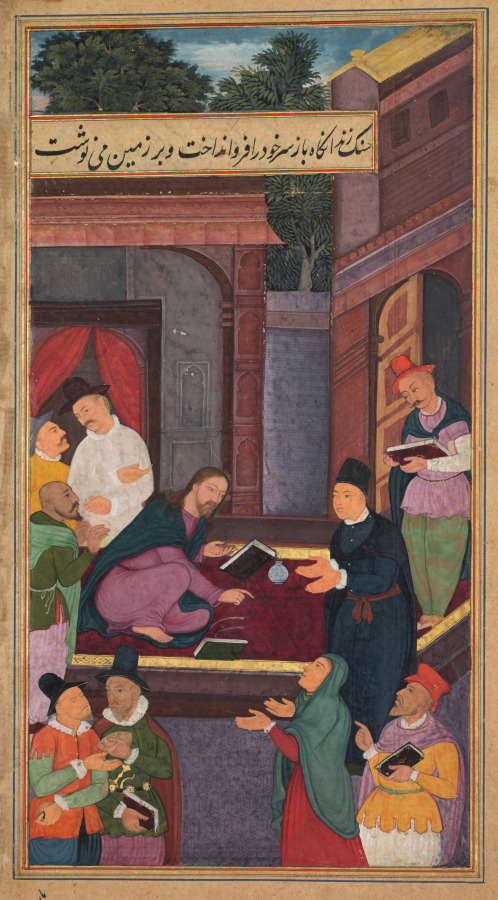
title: Jesus writes on the ground (folio 130 verso), from a Mirror of Holiness (Mir’at al-quds) of Father Jerome Xavier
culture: Mughal India, Allahabad, made for Prince Salim (1569–1627)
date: 1602–4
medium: Gum tempera, ink, color, and gold on paper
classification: Manuscript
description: As Jesus was debating with the scribes and Pharisees in Jerusalem, they brought before him an adulterous woman. Hoping to incite him to violence, they declared that if Jesus followed the law of Moses, he should order her to be stoned to death. Jesus responded, “Let whichever of you is without sin cast the first stone.” Then he began to write with his finger on the ground, and each of the men saw a description of his own sins. The two men in the bottom corner of the painting clutch stones with expressions of doubt, fear, and disgust. The adulteress in the red dress holds out her hands in supplication.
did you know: The adulteress wears a red dress, gold rings, and a necklace under her stole.